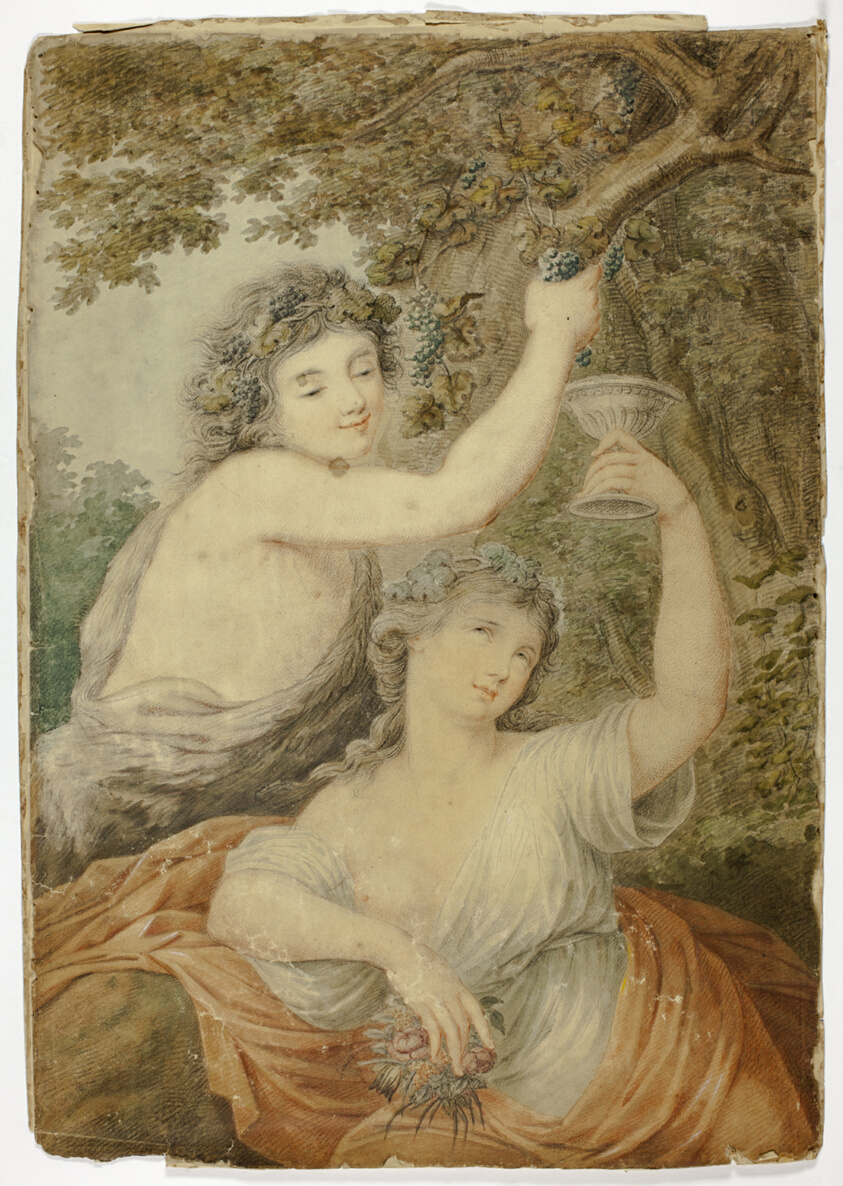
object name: Drawing and Watercolor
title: Bacchus and Maiden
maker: Giovanni Battista Cipriani (Italian, 1727-1785)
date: 1747/1785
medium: Black chalk with brush and watercolor with touches of white chalk, on cream wove paper, tipped onto cream wove paper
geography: England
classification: watercolor; drawings (visual works); prints and drawing